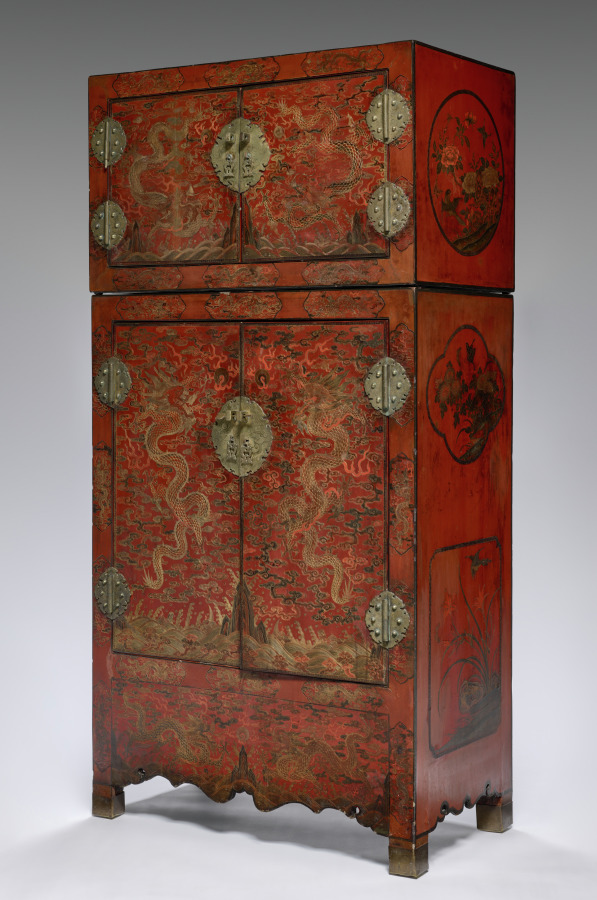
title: Double Cabinet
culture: China, Ming dynasty (1368-1644) - Qing dynasty (1644-1911)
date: 1600s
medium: red lacquer on wood with pigment and gilding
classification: Furniture and woodwork